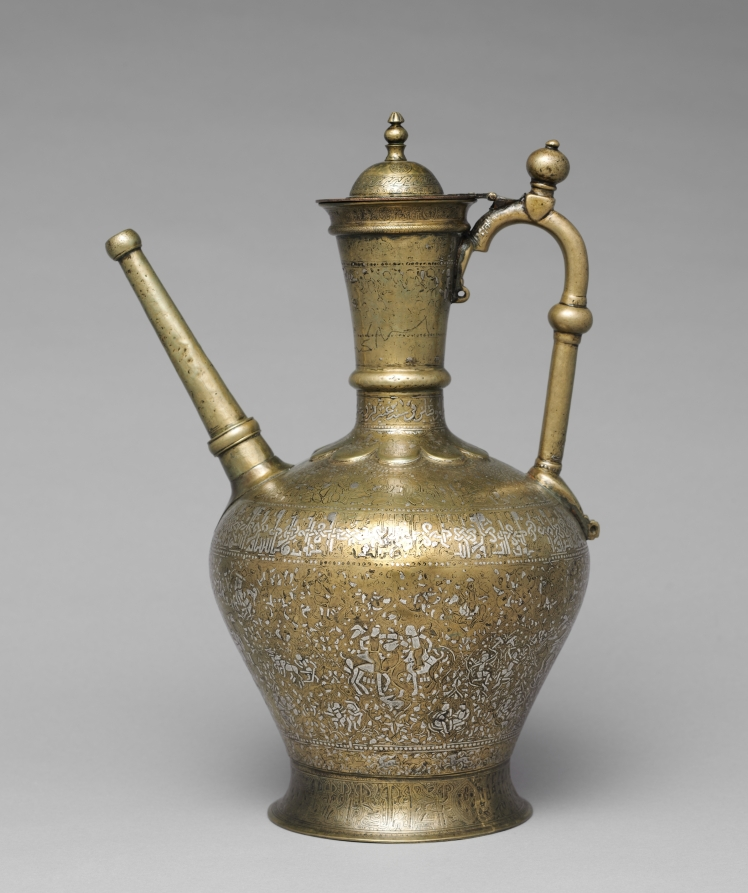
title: Luxury Ewer Extending Good Fortune to the Owner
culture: Iraq, possibly Mosul, Zangid or Artugid Period, 13th Century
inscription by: Ahmad al-Dhaki al-Mawsili (Iraqi, Mosul, active early 1200s?)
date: 1223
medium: brass inlaid with silver; lid and base added later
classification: Metalwork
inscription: Band on the neck (naskh): "Work of Ahmad al-Thaki, the engraver, al-Mawsili, in the year 620 and glory to my owner"; band at the base of the handle (naskh): "Work of Ahmad al-Thaki al-Mawsili"; graffiti of later owners, roughly scratched into the neck of the ewer: "Husayn ibn Qasim"; "Usta al-Muhtasib [?]"; band on the shoulder of the ewer (plaited, animated kufic): "Good luck, and learning, and commanding respect, and prosperity, and pride, and generosity, and faithfulness, and affection, and glory, and survival, and justice, and blessings, and exaltedness, and prosperity, and everlasting peace, and charitable giving."; band on the foot (naskh) [foot is a later addition]; this inscription has not yet been deciphered.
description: This silver inlaid ewer was produced for luxury clientele. The wide band around the body of the vessel displays vignettes of daily and courtly life contained within multilobed medallions. Some of the scenes feature falconry, hunting, dancing, and several groups of musicians. All these scenes are set off against a skillfully executed arabesque background—a pervasive motif in Islamic art characterized by interwoven vegetal and curvilinear elements. An inscription around the ewer’s shoulder extends good fortune, prosperity, and peace to the owner. The ewer is dated 1223 and signed by the master craftsman Ahmad al-Dhaki of Mosul.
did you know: Later owners roughly scratched their names into the neck of the ewer.